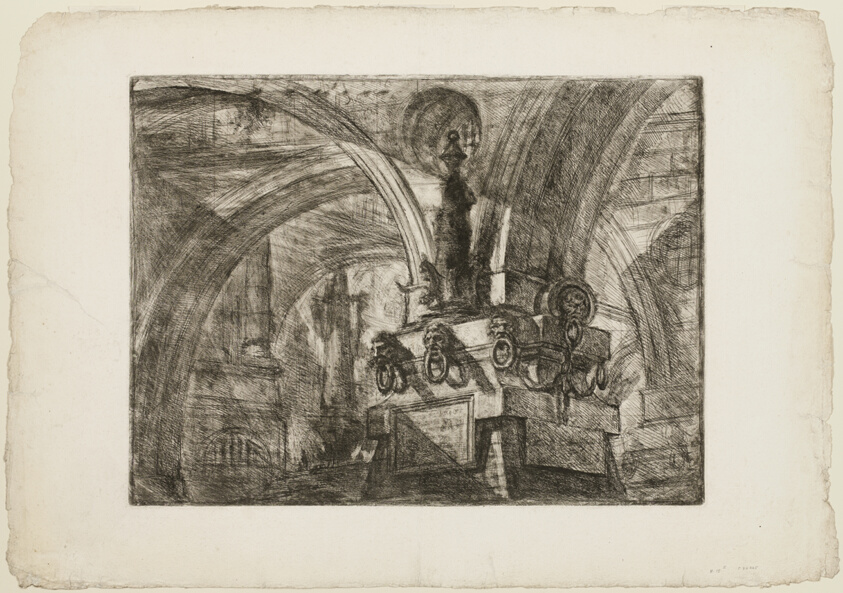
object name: Print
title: The Pier with a Lamp, plate 15 from Imaginary Prisons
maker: Giovanni Battista Piranesi (Italian, 1720-1778)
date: c. 1750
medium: Etching and engraving on heavy ivory laid paper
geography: Italy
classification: etching; print; prints and drawing